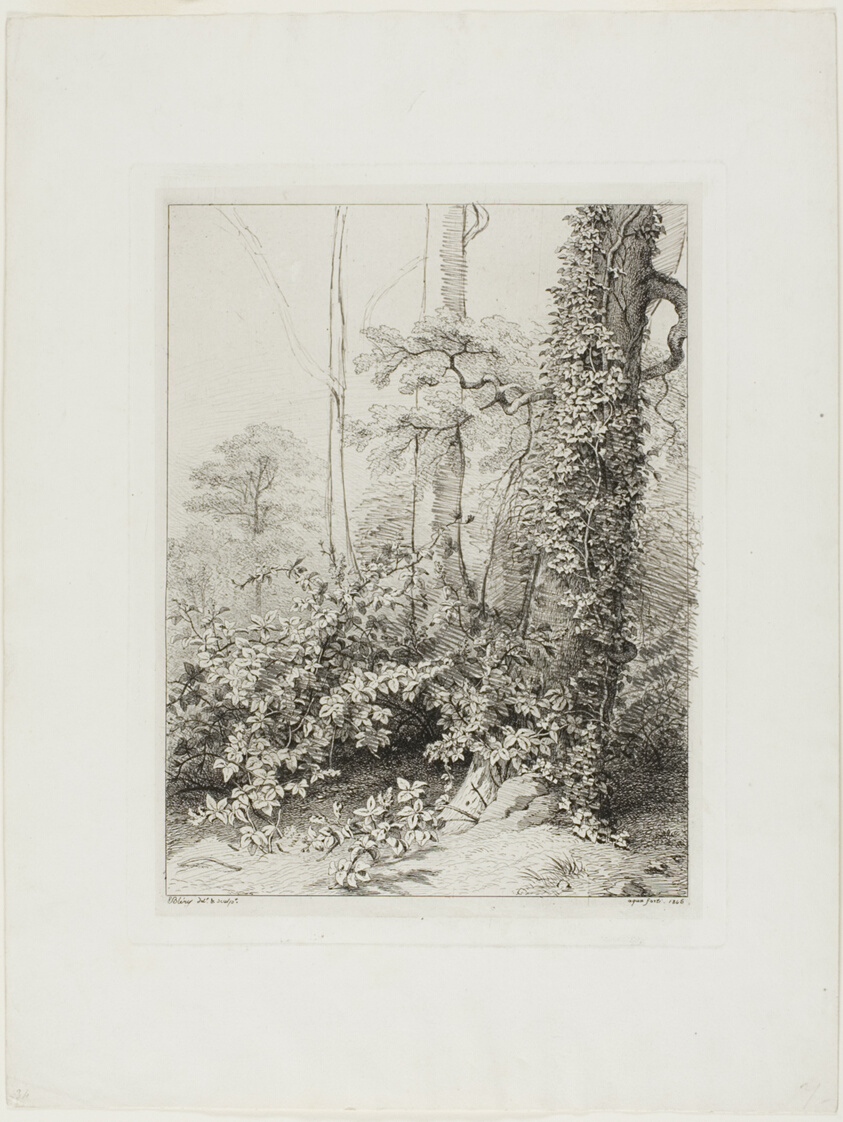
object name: Print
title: Bramble and Ivy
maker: Eugène Blery (French, 1805-1887)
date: 1845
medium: Etching, with additions in dark gray pen and ink, on ivory wove chine collé on ivory wove paper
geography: France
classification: etching; print; prints and drawing